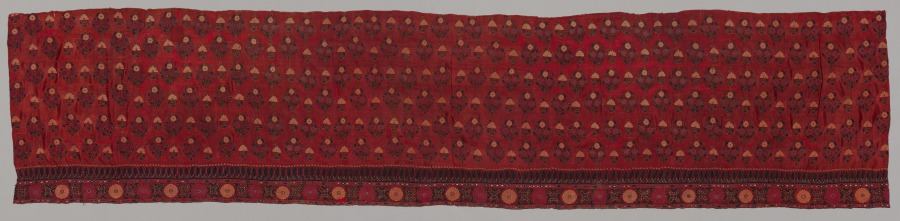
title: Fragment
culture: Western India, Gujarat, Kachchh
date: 1800s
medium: embroidery with mirror inserts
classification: Embroidery